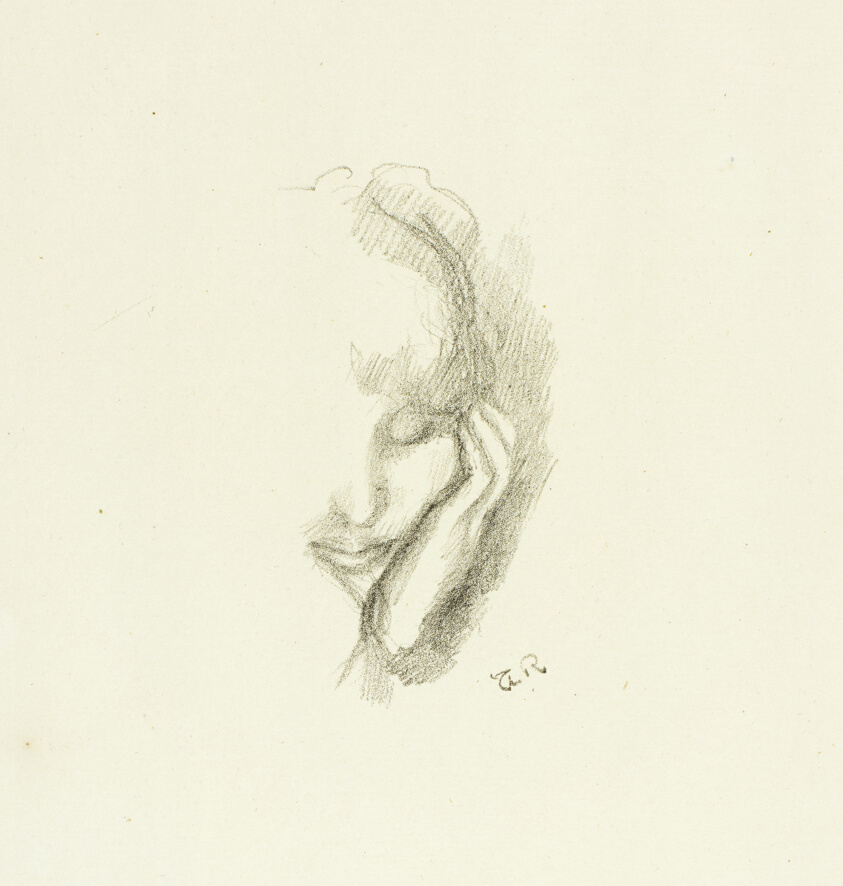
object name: Print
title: Head of a Woman Leaning on Her Hand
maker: Theodore Roussel (French, worked in England, 1847-1926)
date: 1890–94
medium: Transfer lithograph in black on cream laid paper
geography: England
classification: lithograph; paper; print; prints and drawing